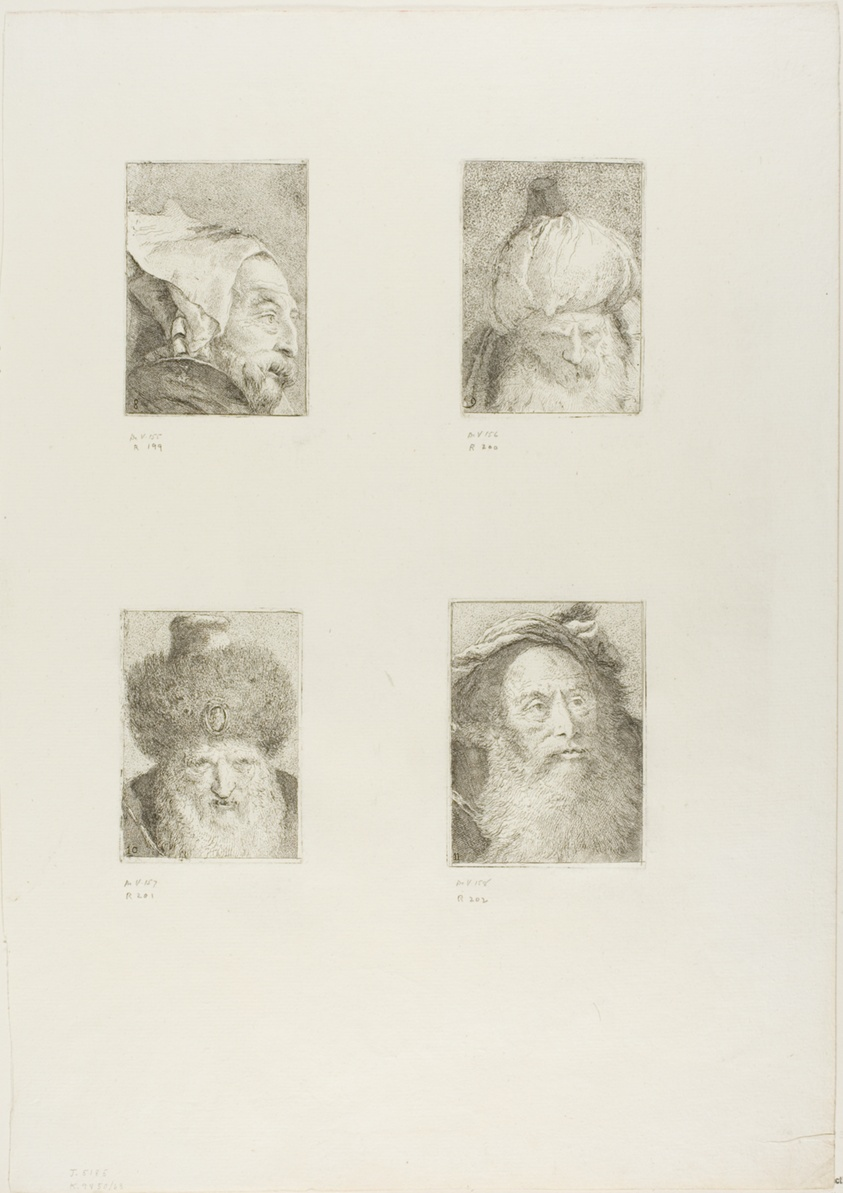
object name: Print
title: Profile of an Old Man, Turk Seen from the Front, Turk with Fur Hat, and Old Man with a Beard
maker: Giovanni Domenico Tiepolo (Italian, 1727-1804)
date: 1775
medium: Four etchings on ivory laid paper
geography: Italy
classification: etching; print; prints and drawing